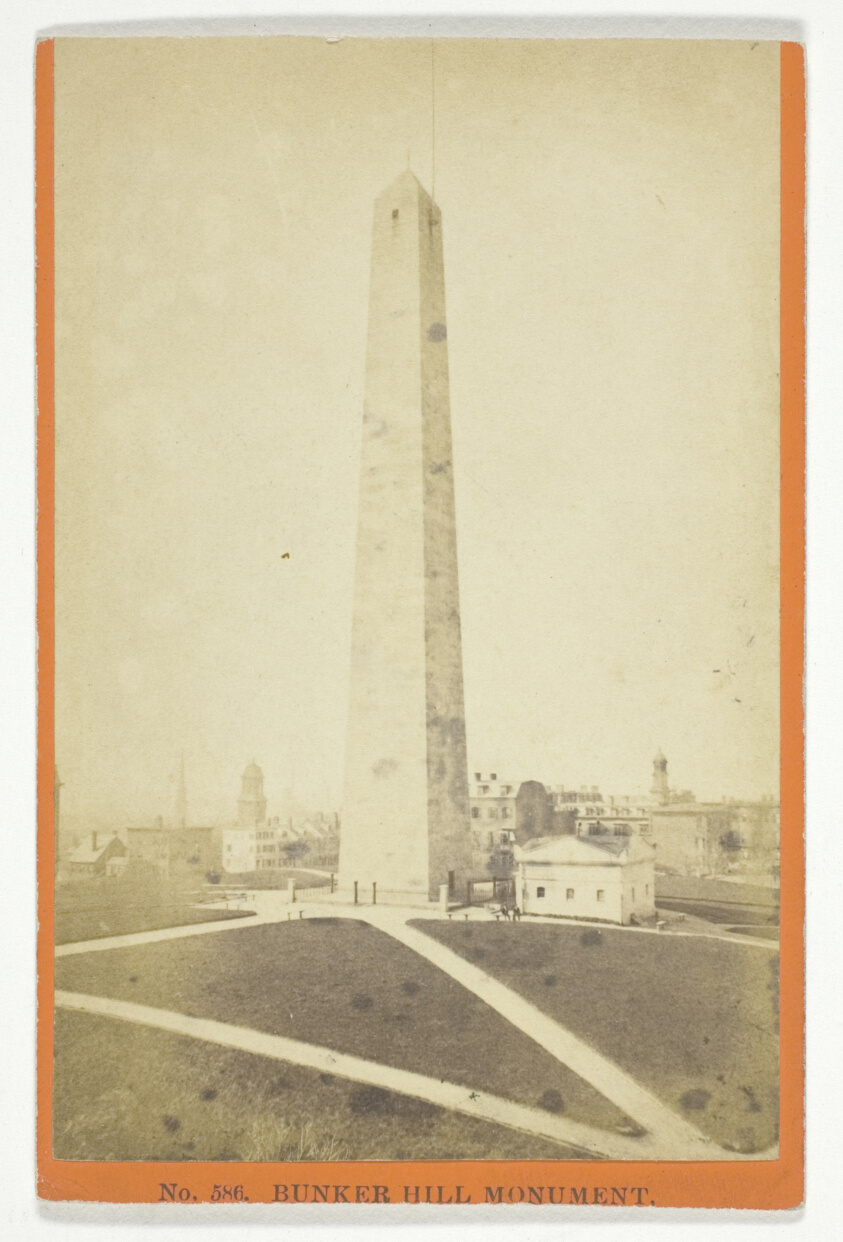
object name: Photograph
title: Bunker Hill Monument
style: 19th century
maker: Artist unknown; American, 19th century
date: 1845/1900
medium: Albumen print (carte-de-visite)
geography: United States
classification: carte-de-visite (albumen); photographic process; photography; card photographs; photograph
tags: Collected by Hugh Edwards